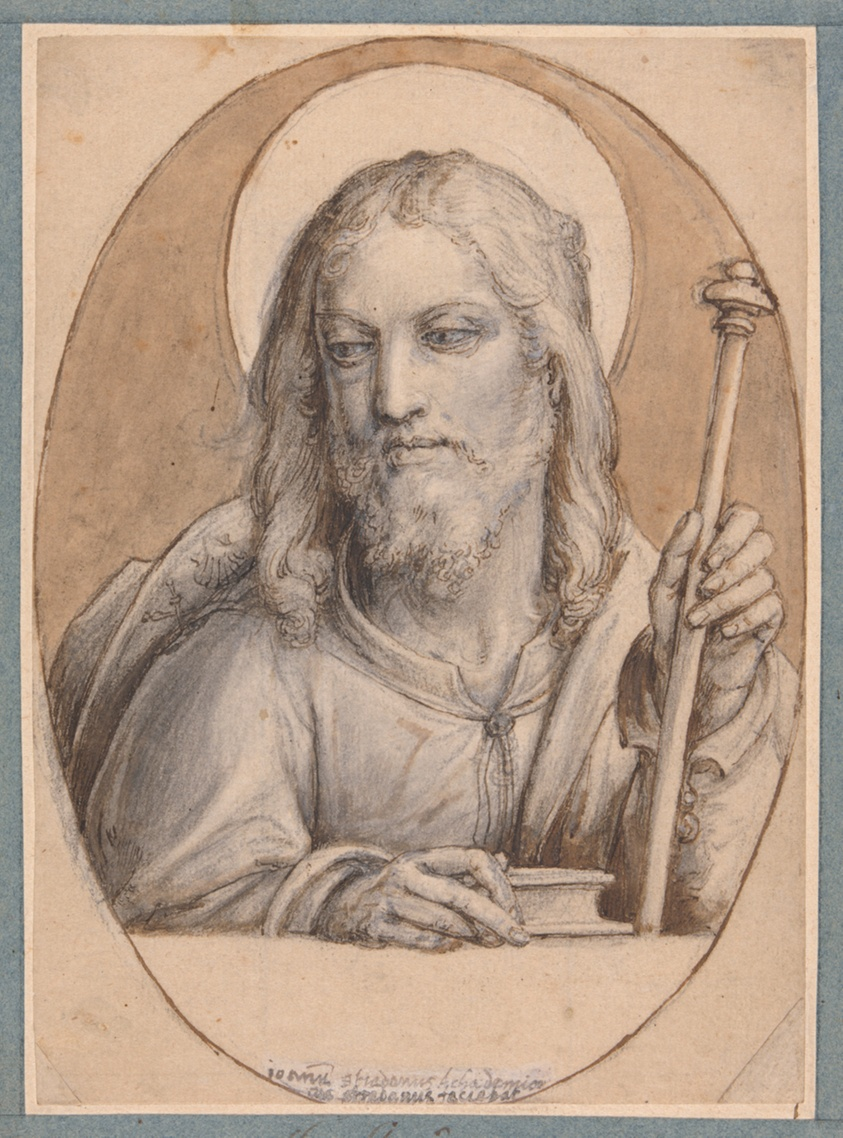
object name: Drawing and Watercolor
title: Saint James the Great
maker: Joannes Stradanus, called Giovanni Stradano; Flemish, 1523-1605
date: 1590/1605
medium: Pen and brown ink and brush and brown wash, with opaque white watercolor, over black chalk, on cream laid paper, incised for transfer and laid down on buff laid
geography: Flanders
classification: ink with wash; drawings (visual works); prints and drawing